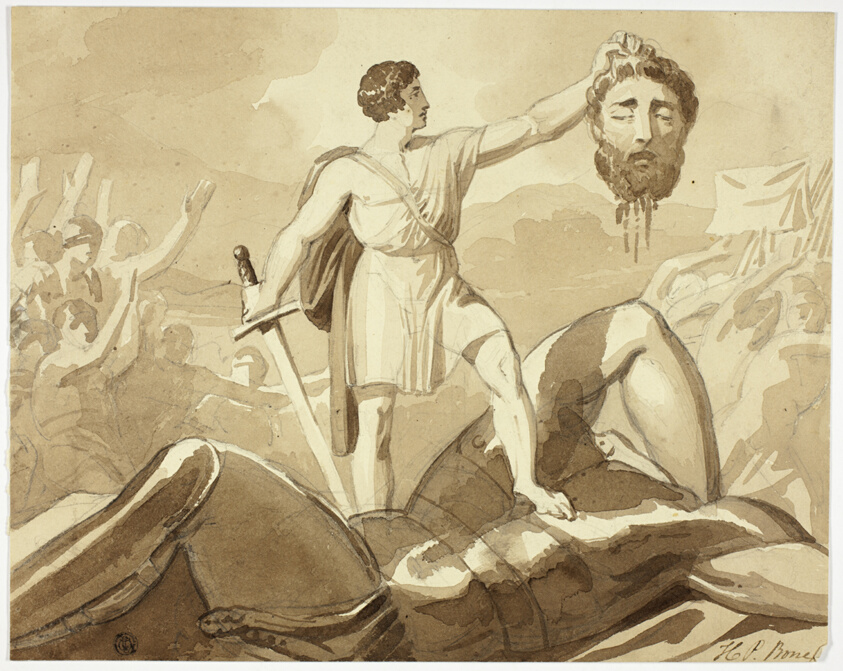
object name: Drawing and Watercolor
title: David and Goliath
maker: Henry Pierce Bone (English, 1779-1855)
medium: Brush and brown wash, with graphite, on cream wove paper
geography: England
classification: ink or chalk wash; drawings (visual works); prints and drawing; brush and wash; paper